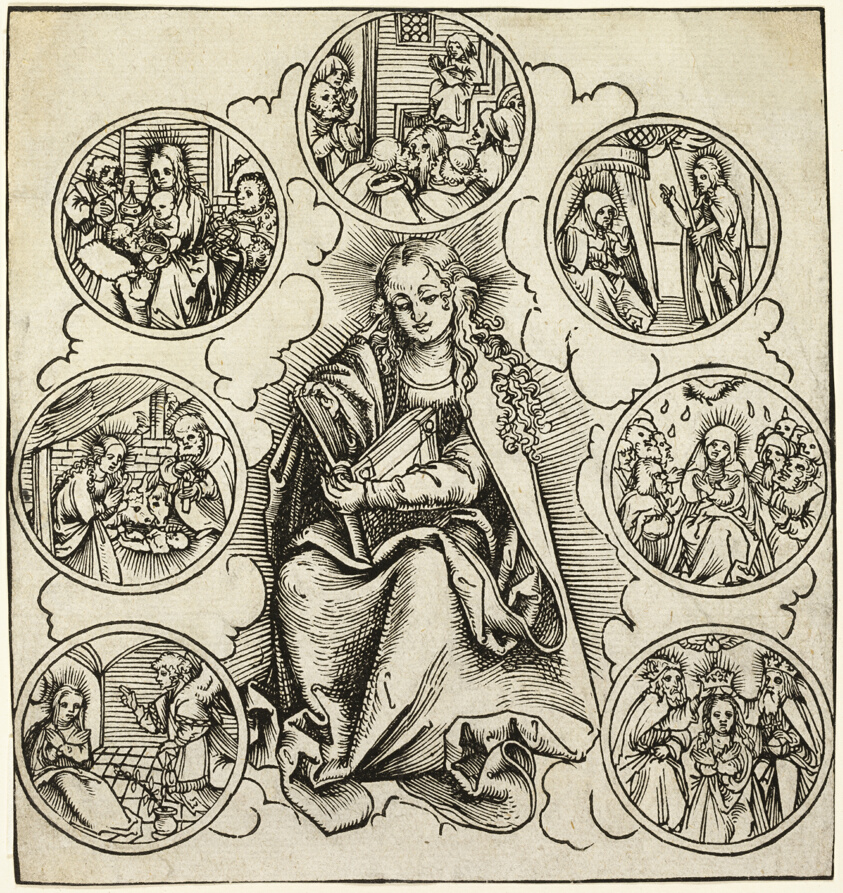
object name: Print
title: The Seven Joys of Mary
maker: Lucas Cranach the Elder (German, 1472-1553)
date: 1510/1515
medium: Woodcut in black on cream laid paper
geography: Germany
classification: woodcut; print; prints and drawing